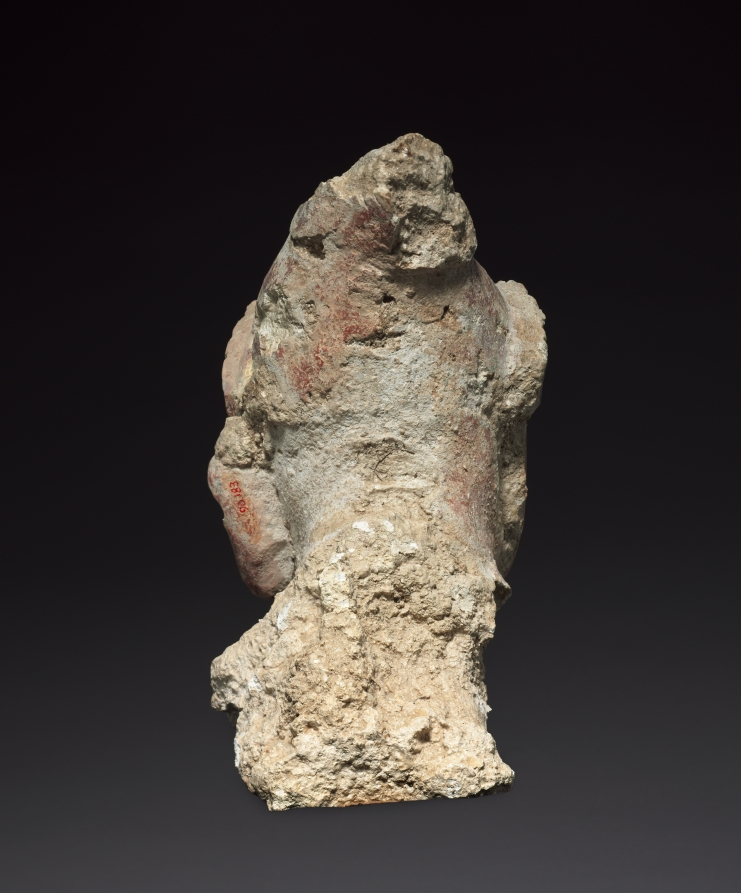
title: Head from a Building's Façade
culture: Mexico, Campeche, Maya style (250-900)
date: 250–900 CE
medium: stucco, paint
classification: Sculpture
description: The Maya often lavishly decorated the exteriors of buildings, transforming them into elaborate sculptural works in their own right. This sensitively modeled head, made from fragile stucco, would have been affixed to the façade of a palace or temple via the tenon (projection) at the back of the head. The rest of the body may have been modeled separately.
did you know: Maya elites practiced cranial modification on infants to achieve the sloped profile seen in this tenoned head.